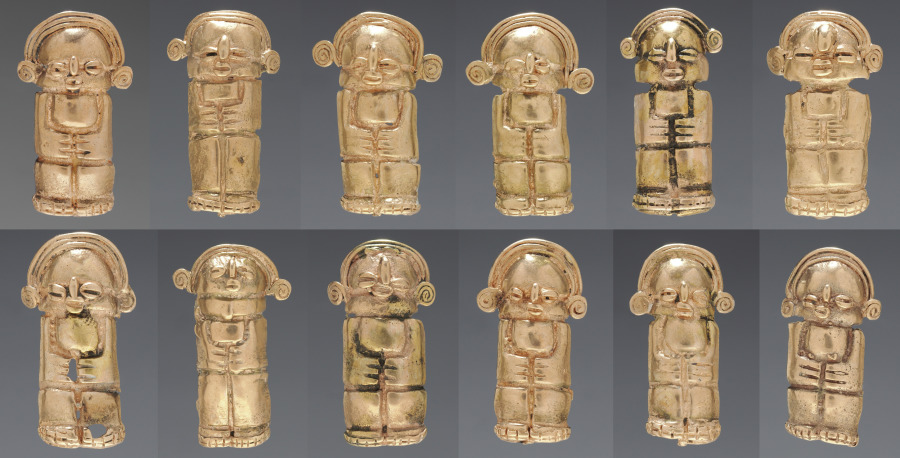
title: Necklace Figurine Beads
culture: Colombia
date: 1–700 CE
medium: cast gold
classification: Jewelry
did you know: Working with gold dates back to at least 500 BC in Ecuador and Colombia.